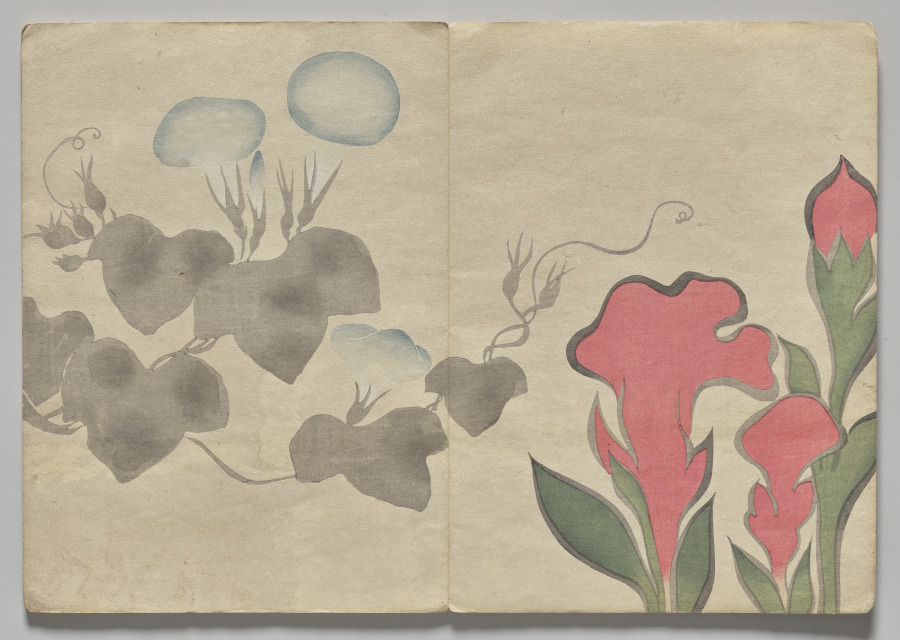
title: Scene from The Kōrin Picture Book (Volume 1)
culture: Japan, Edo period (1615–1868)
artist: Nakamura Hōchū (Japanese, d. 1819)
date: 1800s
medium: color woodblock printed book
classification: Bound Volume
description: Ogata Korin (1658-1716) was one of the most admired artists of Rimpa, or "decorative school painting." These books by the charming later-generation Rimpa artist Hochu record Korin's inventive designs.